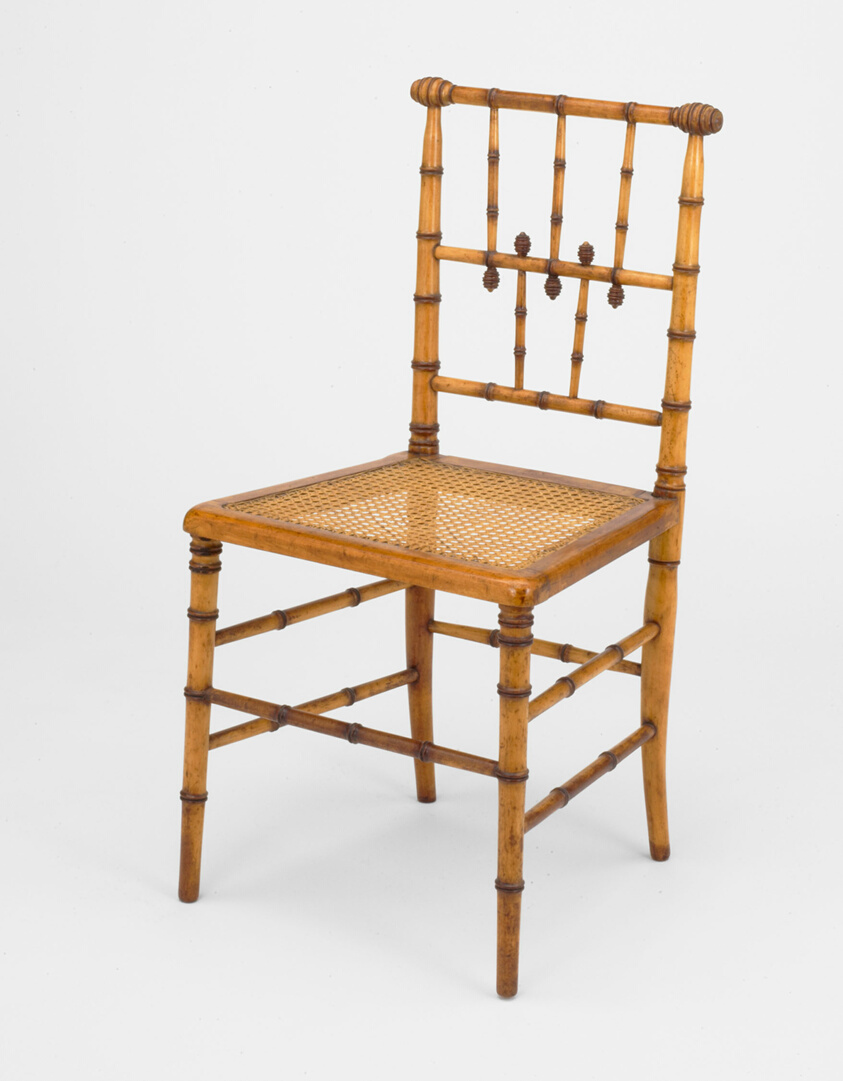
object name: Furniture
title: Side Chair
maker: Attributed to R. J. Horner and Company (American, active 1886–c. 1915); New York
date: c. 1890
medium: Maple and birds-eye maple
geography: New York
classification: furniture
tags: furniture